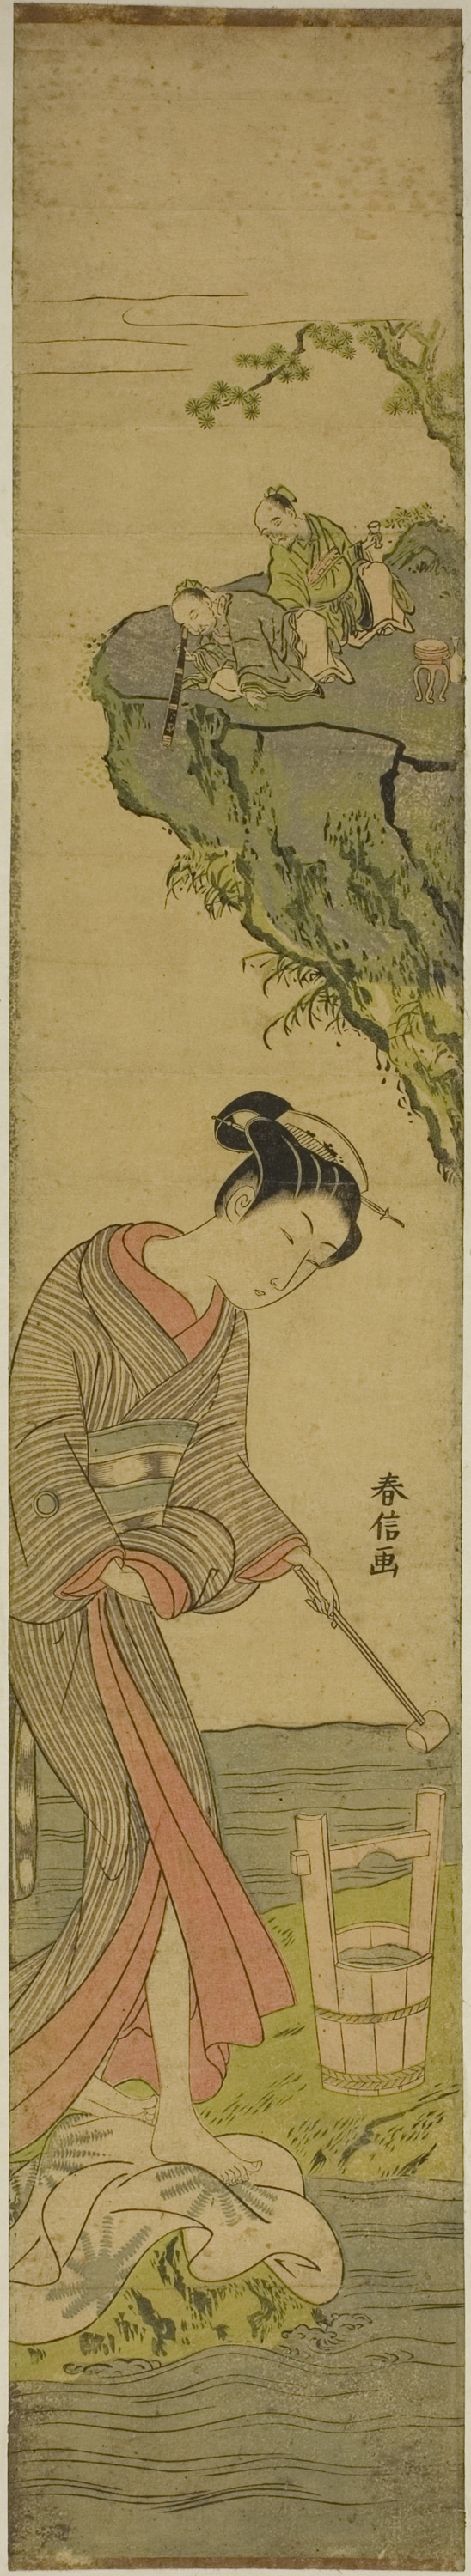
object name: Print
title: Two Sages Gazing at a Beauty Treading Cloth (parody of Kume Sennin)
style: Japanese (culture or style)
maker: Suzuki Harunobu 鈴木 春信; Japanese, 1725 (?)-1770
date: c. 1769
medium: Color woodblock print; hashira-e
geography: Japan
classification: print; asian art